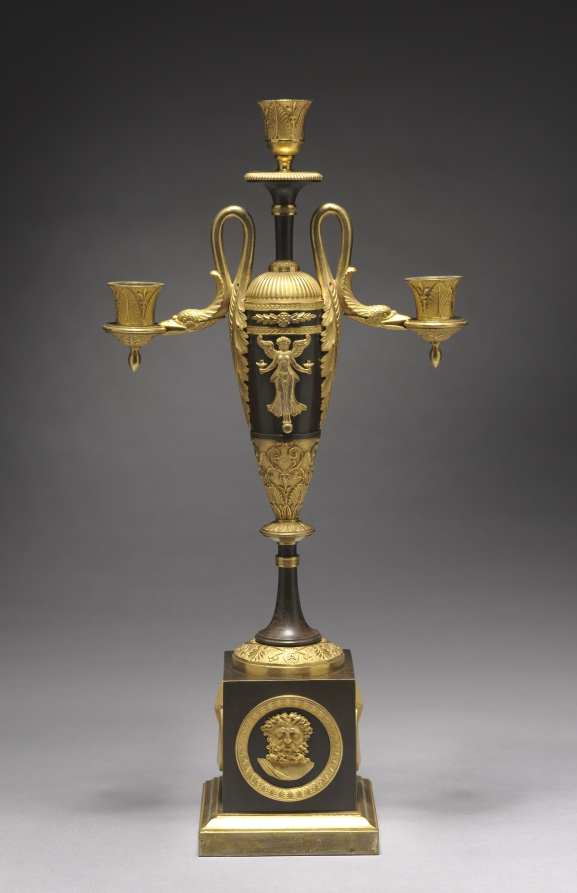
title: Candelabrum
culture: France, late 18th-early 19th century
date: c. 1800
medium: gilt and patinated metal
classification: Furniture and woodwork